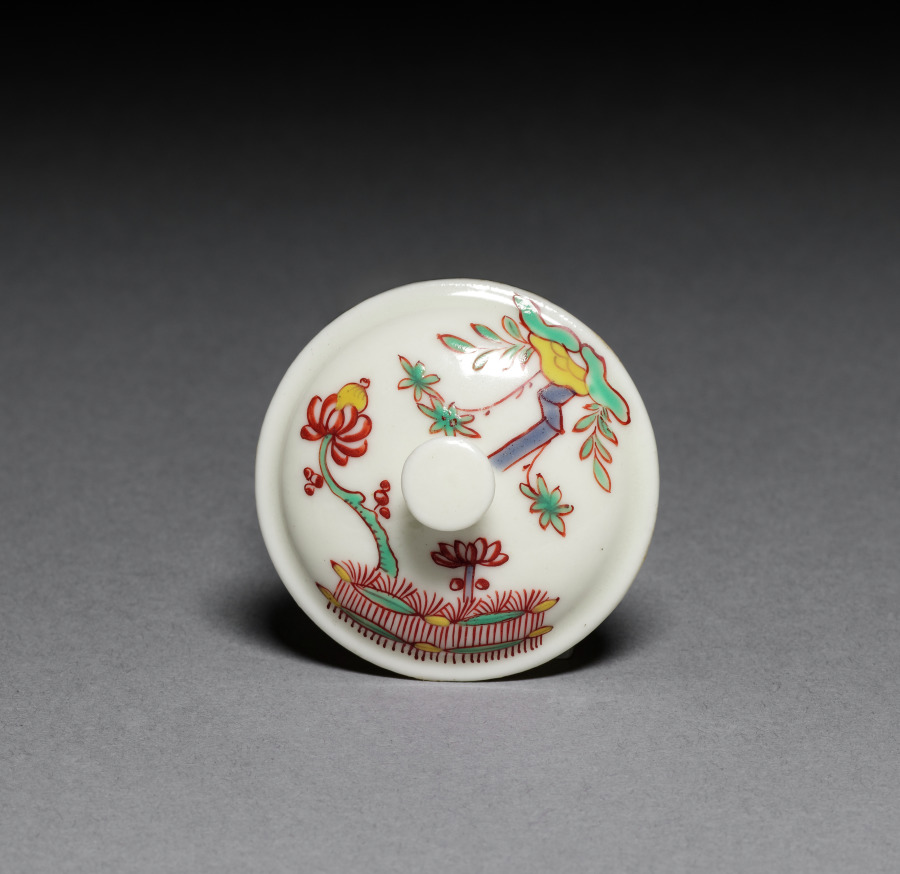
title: Cover for a Pomade Pot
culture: France, 18th century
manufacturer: Saint Cloud Porcelain Factory (French)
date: c. 1730–40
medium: soft-paste porcelain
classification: Ceramic